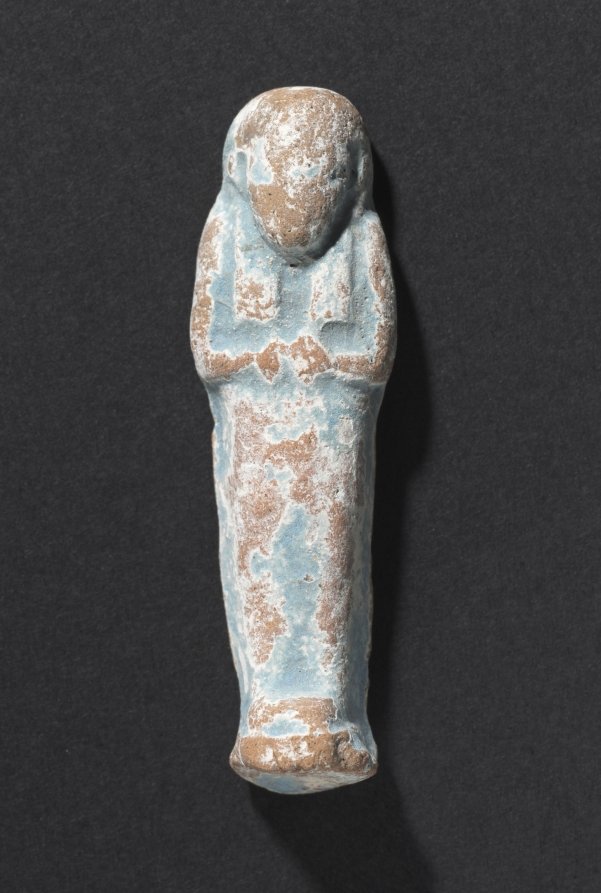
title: Shawabty of Ditamenpaankh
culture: Egypt, Late period (715–332 BCE), Dynasty 25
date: 715–656 BCE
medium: terracotta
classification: Funerary Equipment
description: High demand for shawabtys in the Late Period, a time when as many as 400 or more shawabtys were placed in the tomb with the deceased, gave rise to a specialized container for storing them: the shawabty box. This example is inscribed for the lady of the house, Ditamenpaankh, and was probably one of a pair originally made for her. The single-masted boat on the box's lid is perhaps an allusion to the pilgrimage of the deceased to the holy city of Abydos, the cult city of Osiris, king of the dead. The shawabtys inside are crude, mass-produced examples cast in an open mold. Made of terracotta, their blue paint imitates more costly shawabtys made of faience. As for the shawabty spell, it has been removed from its traditional location on the shawabty's front and relocated onto the sides of box, where it needed only to be written once, thus expediting production.